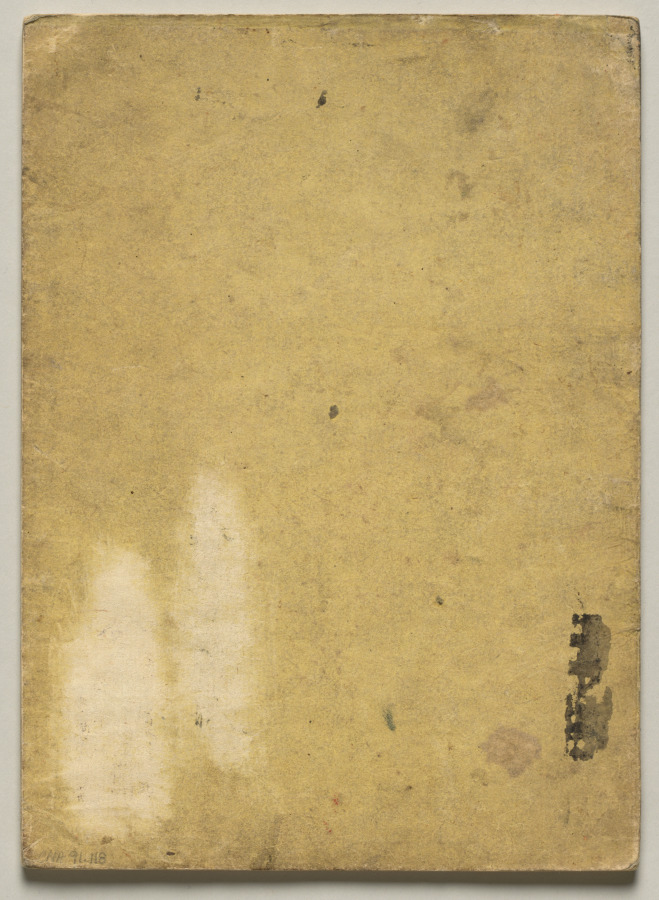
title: The Kōrin Picture Book (Volume 2)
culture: Japan, Edo period (1615–1868)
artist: Nakamura Hōchū (Japanese, d. 1819)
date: 1800s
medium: One of a set of two woodblock printed folding-books; ink and color on paper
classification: Bound Volume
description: Ogata Korin (1658-1716) was one of the most admired artists of Rimpa, or "decorative school painting." These books by the charming later-generation Rimpa artist Hochu record Korin's inventive designs.